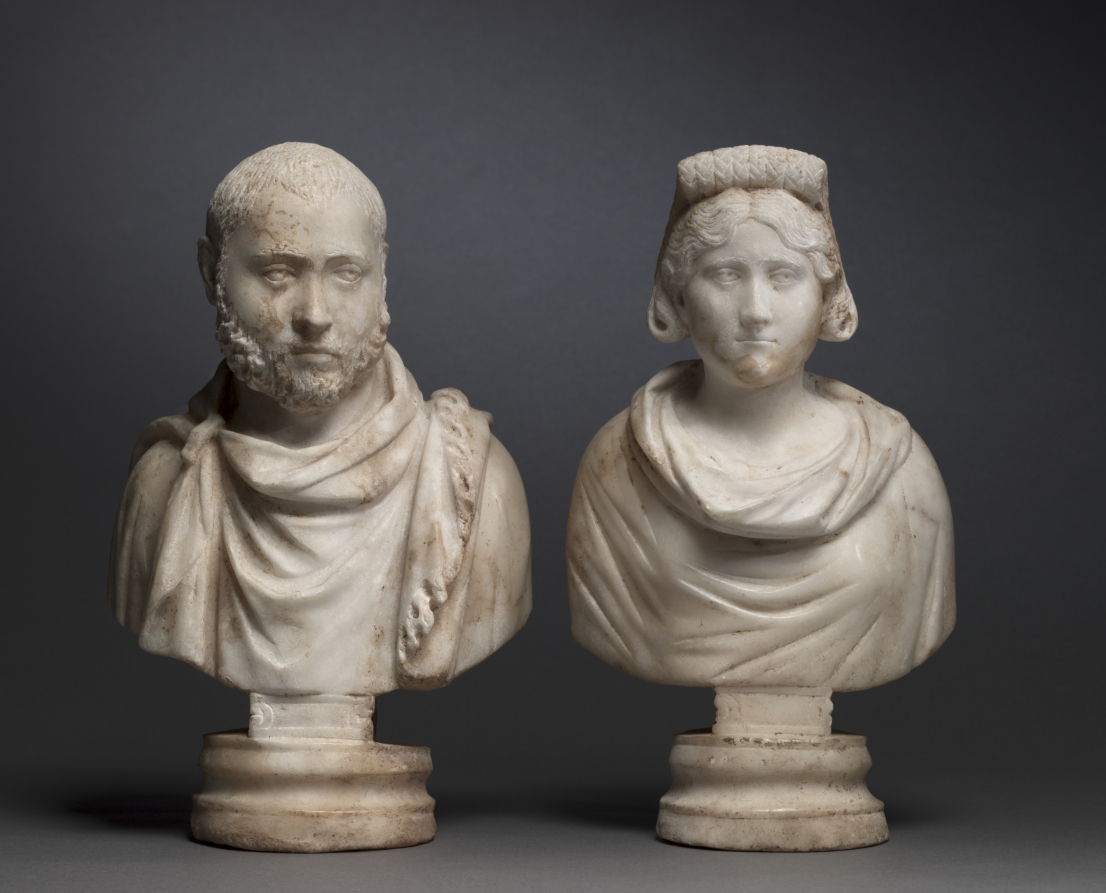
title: Portrait Bust of an Aristocratic Man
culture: Anatolia, late Roman-early Christian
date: 280–90 CE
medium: marble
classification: Sculpture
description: These three pairs of marble portrait busts depict an aristocratic Roman couple. They are unique in representing the same couple three times with only minor variations in costume. Allegedly found together with the Jonah Marbles, they may represent the Christian patrons who commissioned the Jonah cycle.